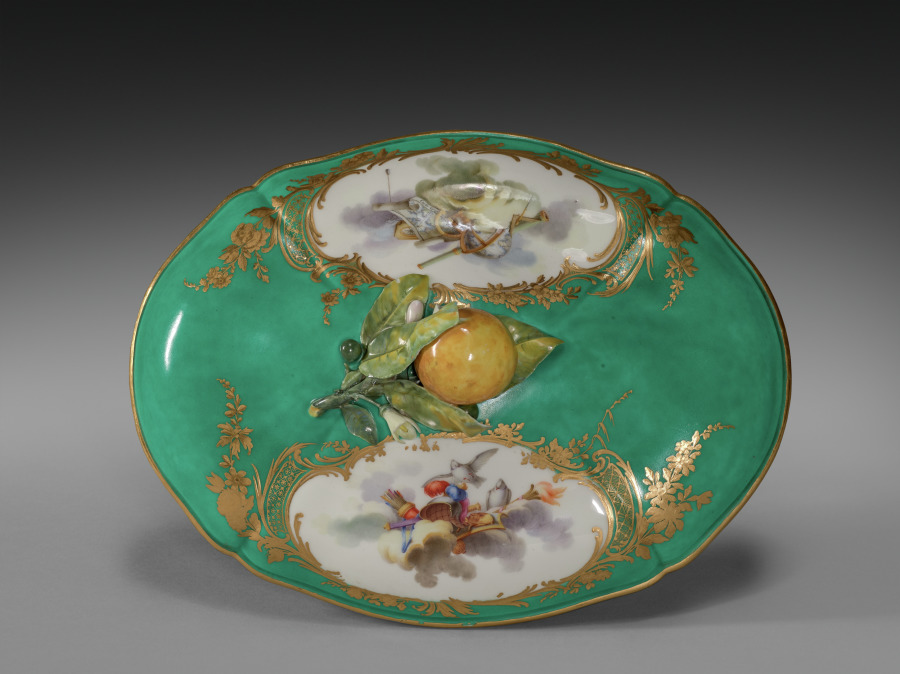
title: Cover for a Tureen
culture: France, Sèvres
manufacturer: Sèvres Porcelain Factory (French, est. 1756)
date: 1756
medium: soft-paste porcelainwith enamel and gilt decoration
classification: Ceramic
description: This tureen is probably from a service presented by Louis XV to King Frederick V of Denmark in 1758.